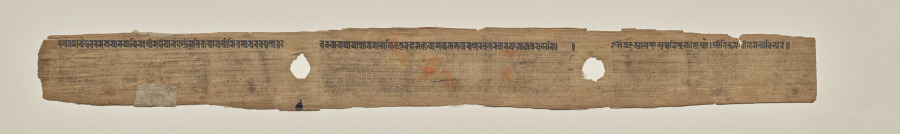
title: Colophon, folio 188 (recto), from a Manuscript of the Perfection of Wisdom in Eight Thousand Lines (Ashtasahasrika Prajnaparamita-sutra)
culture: Eastern India, Bihar, Vikramashila Monastery. Painting: Nepal, Kathmandu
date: Sunday, September 14, 1119 (year 239 of the Newar Samvat in the month of Ashvina)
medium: gum tempera and ink on palm leaves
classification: Painting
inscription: deyadharmo yaṃ pravaramahāyānayāyinaḥ śrīmannepāladeśīyabhikṣuāryaśrīmittrasya yad=atra puṇyan=ta; ○ d=bhavatv=ācāryopādhyāyamātāpitṛpūrvaṅgamaṅ=kṛtvā sakalasattvarāśer=anuttarajñānaphalāvāptaya iti || || ○ [siddham] samvat* ā la ña aśvaniśuklāṣṭamyāṃ | śrīvikramaśīlamahāvihāre ||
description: This manuscript was commissioned by a Nepalese monk named Aryashrimittra in the year 239 of the Nepalese lunisolar calendar. This date corresponds specifically to 1119. Monks and laypeople alike became patrons of books in order to accrue religious merit, or punya, for themselves, their families, and their teachers. Doing so not only showed the patron’s piety and status, but also assisted them in the cycle of reincarnation by excising bad karma. Commissioning books was also favorable because doing so disseminated the Buddha’s teachings, as books are portable, unlike large stone monuments.